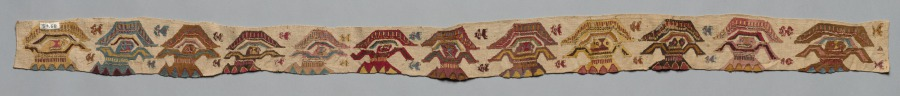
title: Lower Border of a Garment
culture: Central Andes, North Coast, Chimú or Lambayeque (Sican) People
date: 1000–1470s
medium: tapestry; wool and cotton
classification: Textile